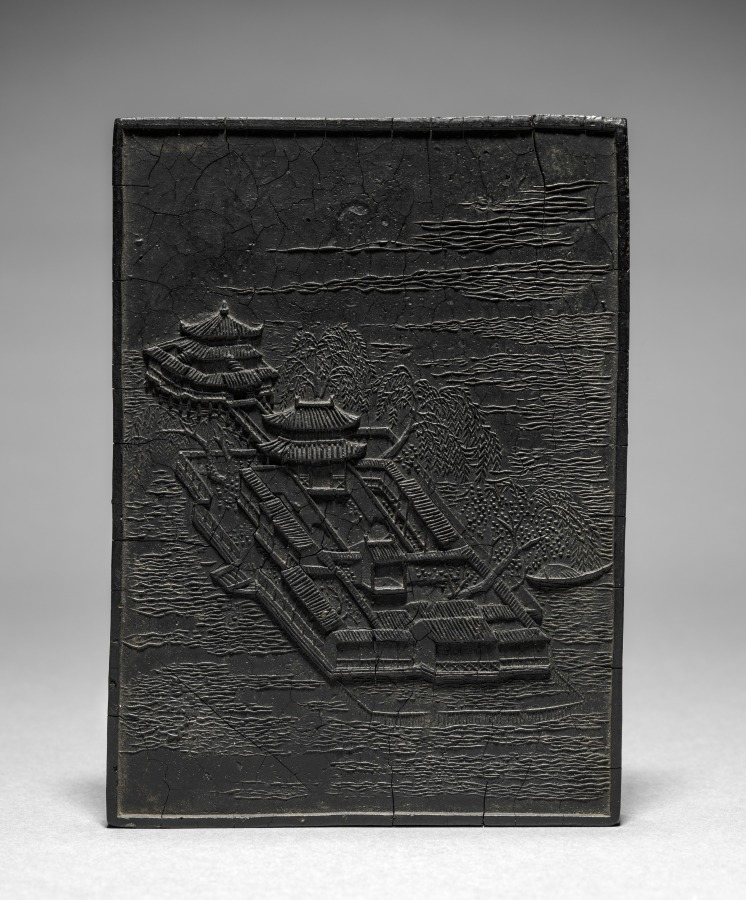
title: Ink Cake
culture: China, Qing dynasty (1644–1911), Qianlong reign (1736–95)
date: 1736–95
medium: ink cake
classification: Miscellaneous